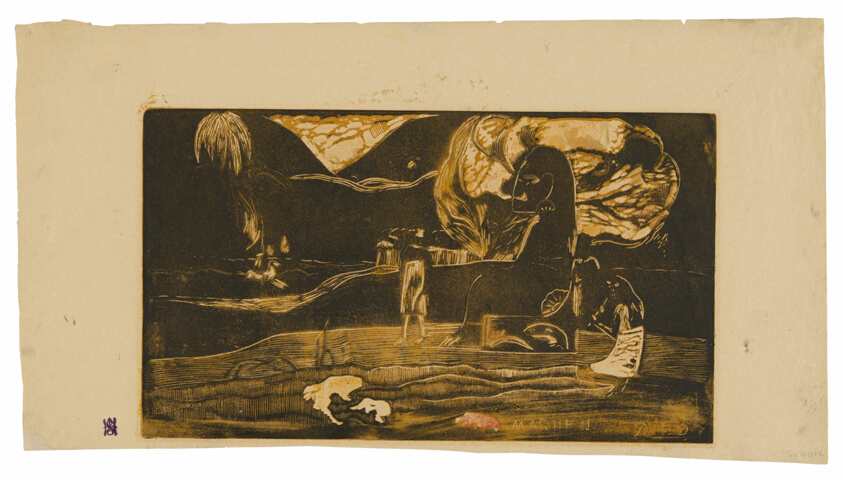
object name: Print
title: Maruru (Offerings of Gratitude), from the Noa Noa Suite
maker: Paul Gauguin (French, 1848-1903)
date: 1893/94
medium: Wood-block print, printed twice in yellow ocher and black inks, with selective wiping of the black ink, over a yellow ink tone block, transferred golden-yellow, green, and red-orange, and stenciled red oil-based media, some containing beeswax and conifer resin (probably pine resin), on cream wove paper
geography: France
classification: woodcut; print; prints and drawing